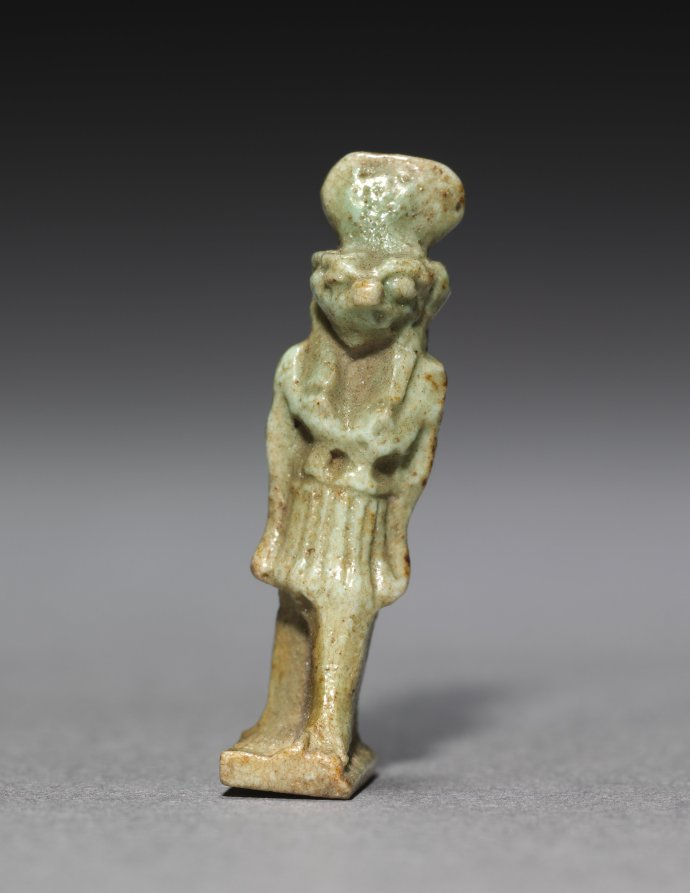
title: Amulet of Ra-Horakhty (?)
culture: Egypt, Late period (715–332 BCE), Dynasty 30–Greco-Roman period (332 BCE–395 CE), Ptolemaic dynasty (305–30 BCE)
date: 380–30 BCE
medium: gray green faience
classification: Amulets